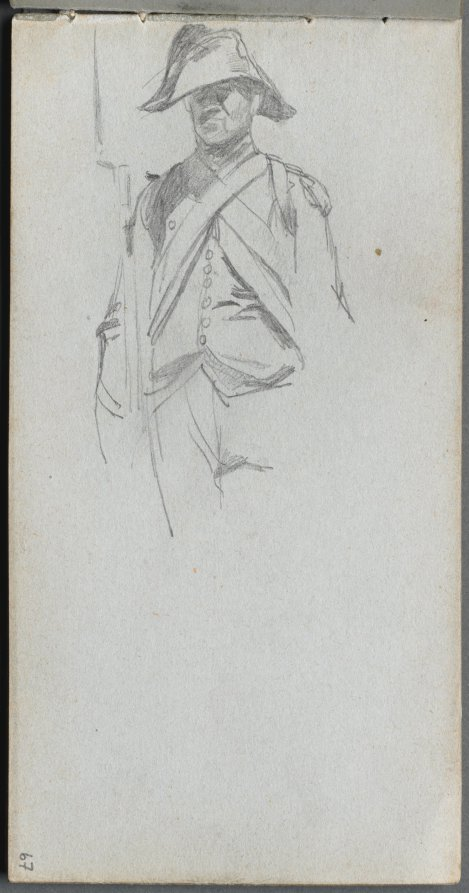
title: Sketchbook, page 67: Study of a Soldier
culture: France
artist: Ernest Meissonier (French, 1815–1891)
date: c. 1860s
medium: graphite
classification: Bound Volume